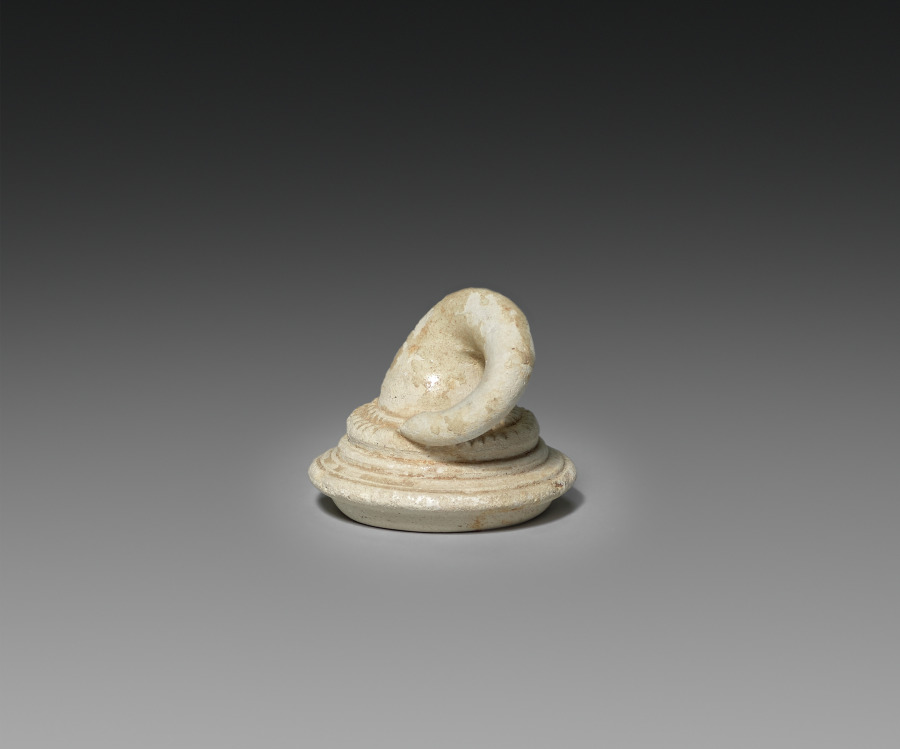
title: Jar in the Shape of a Fruit (Lid)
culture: Cambodia, Northeast Thai kiln, Khmer Ware, Angkor Wat/Bayon period, 12th century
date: 1100s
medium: glazed pottery with brown slip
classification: Ceramic